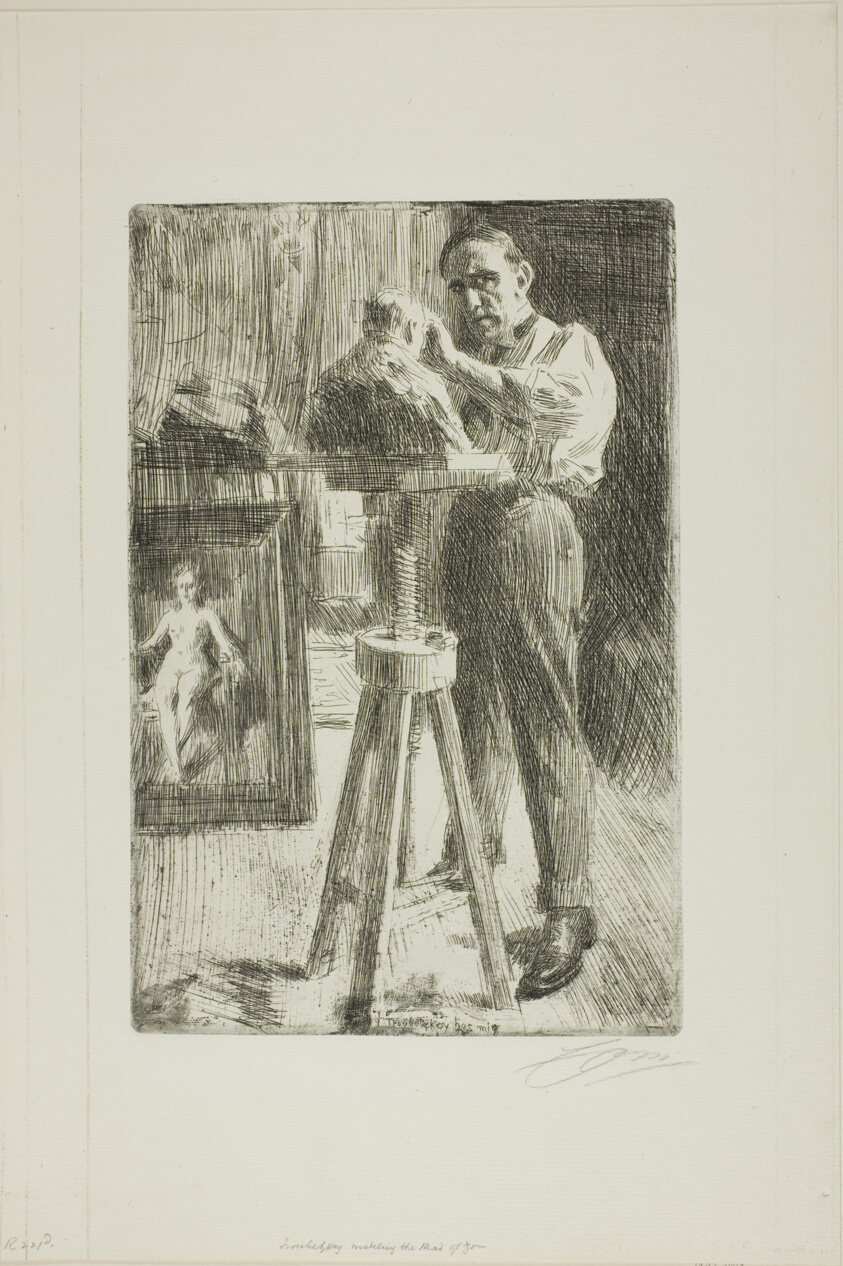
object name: Print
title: Prince Paul Troubetzkoy I (Whole length)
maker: Anders Zorn (Swedish, 1860-1920)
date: 1908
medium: Etching on ivory laid paper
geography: Sweden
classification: etching; print; prints and drawing